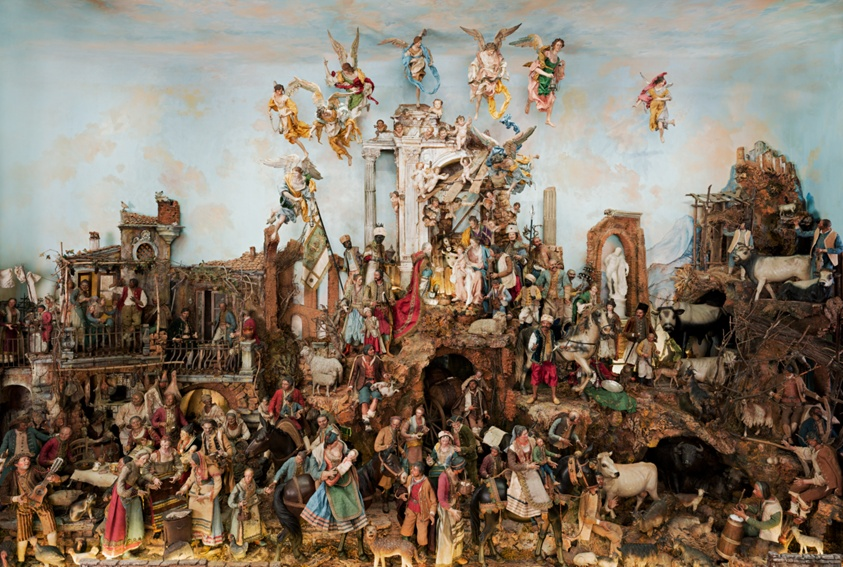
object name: Installation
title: Crèche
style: 18th Century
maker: Neapolitan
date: 1725–75, with later additions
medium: Mixed media including cloth, cork, gouache, metal, moss, papier-mâché, polychrome, terracotta, straw, watercolor, wax, and wood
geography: Naples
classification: mixed media; european painting; installation; figure; textile; furniture; painting; paint; Italian; sculpture/wood; sculpture; wood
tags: crèches, Jesus, Christmas, nativity scenes, religious scenes, angels, animals, architectural fragments, babies, cats, cherubs, Chicken, child, children, classical, dog, donkeys, fathers, flowers, food, hats, holy family, horse, horses, instruments, kings, labor, men, monkeys, mother, music, musical instruments, plates, putti, religion, religious, religious figures, royal, ruins, saints, sculpture, sheep, sons, travel, Virgin and child/Madonna and child, woman, women, work